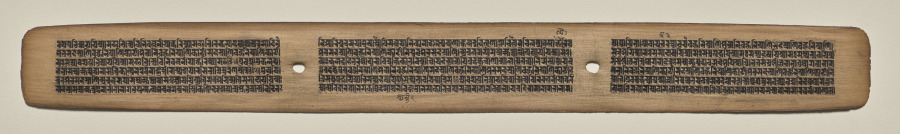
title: Text, Folio 80 (recto), from a Manuscript of the Perfection of Wisdom in Eight Thousand Lines (Ashtasahasrika Prajnaparamita-sutra)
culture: Eastern India, Bihar, Vikramashila Monastery. Painting: Nepal, Kathmandu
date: Sunday, September 14, 1119 (year 239 of the Newar Samvat in the month of Ashvina)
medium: gum tempera and ink on palm leaves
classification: Painting